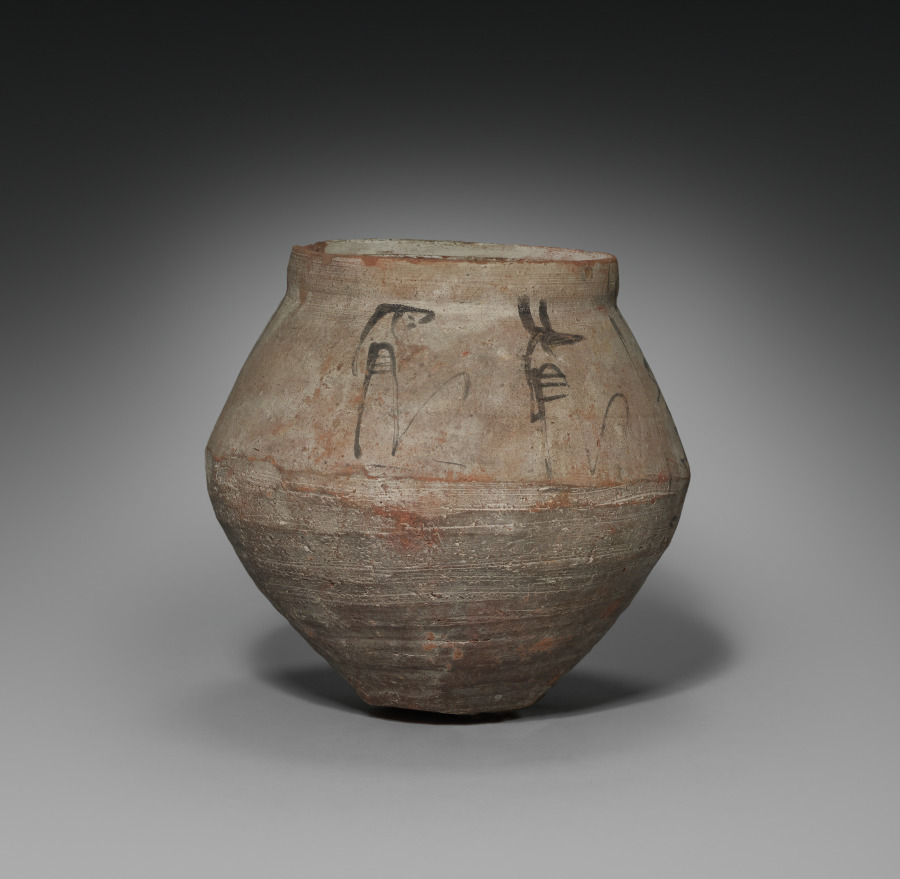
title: Shawabty Jar with Lid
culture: Egypt, New Kingdom (1540–1069 BCE), Dynasties 19–20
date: 1295–1069 BCE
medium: Nile silt ware; lid of limestone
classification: Funerary Equipment